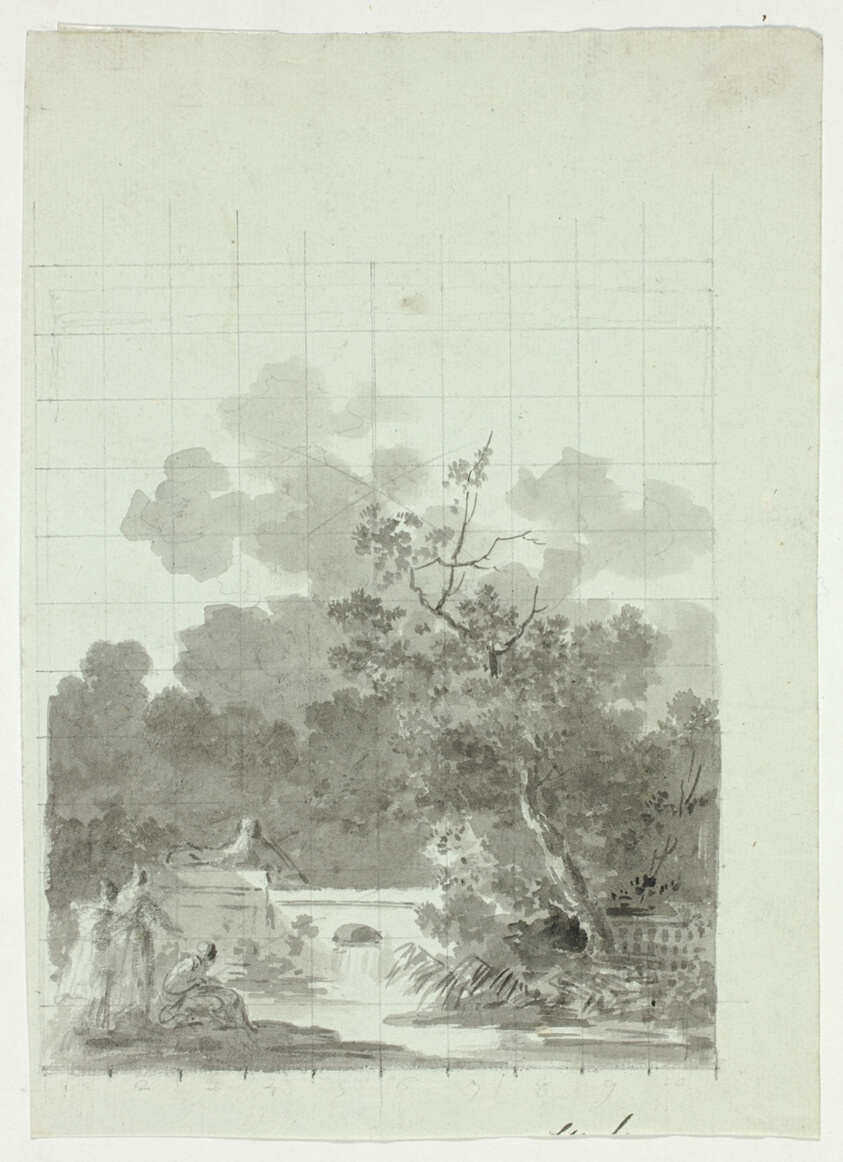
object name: Drawing and Watercolor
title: View of the Park at Versailles: Fishing in Pond Near Grove of Trees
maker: Pierre Antoine Mongin (French, 1761-1827)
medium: Brush and gray wash, with graphite, on pale green laid paper, squared in graphite for transfer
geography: France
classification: ink or chalk wash; drawings (visual works); prints and drawing